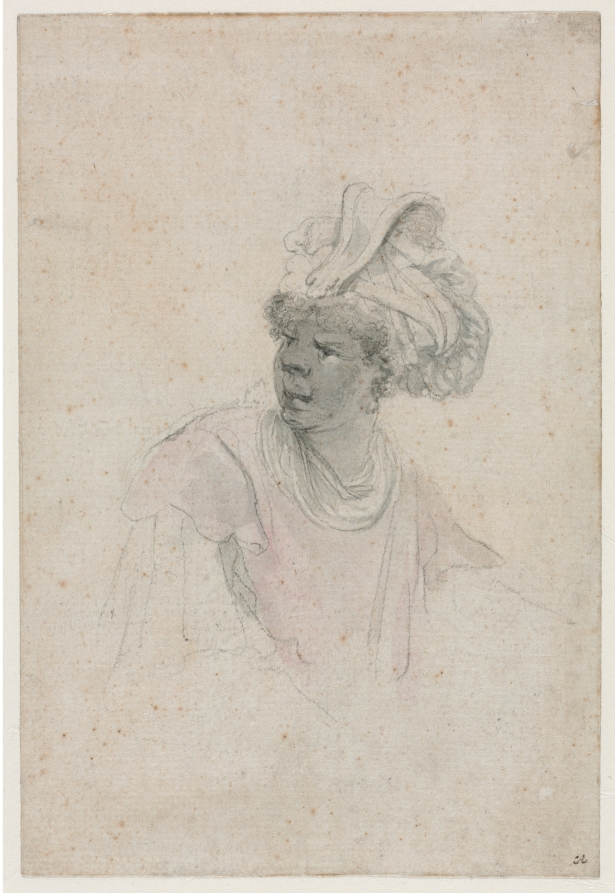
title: Study of a Moor, Facing to the Left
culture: Italy, 17th century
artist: Stefano Della Bella (Italian, 1610–1664)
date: c. 1657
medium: Black chalk with pink and gray washes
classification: Drawing